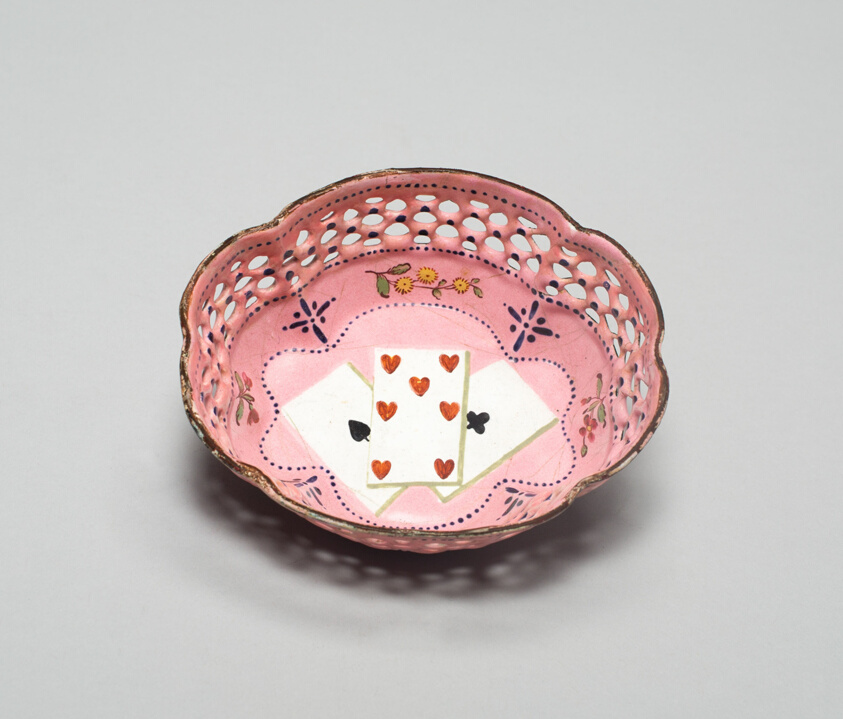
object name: Metalwork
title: Counter Tray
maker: South Staffordshire, England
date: c. 1790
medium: Polychrome enamel on copper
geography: South Staffordshire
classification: tableware; enamel; metalwork